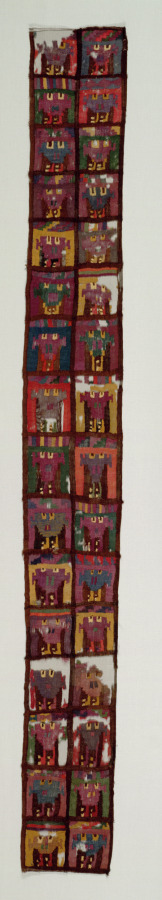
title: Band with Trophy Heads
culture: Peru, South Coast, Nasca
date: 100 BCE–700 CE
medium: interlocking warp and weft, single interlock: wool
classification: Textile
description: This band, remarkable for its intense color and spider-web sheerness, was created using an unusual technique known as discontinuous warp and weft. That is, none of the vertical or horizontal yarns are continuous from one side of the band to the other. Rather, they travel back and forth within their own color areas, linking at the edges with yarns in adjacent areas. This is a difficult feat when weaving on a loom and the creator likely used another approach, such as darning with a needle over a ground cloth that was then removed. The image repeated in each of the band’s rectangles is a head supported on two little feet.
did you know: This band is made in with a weaving technique that is unique to the ancient Andes.